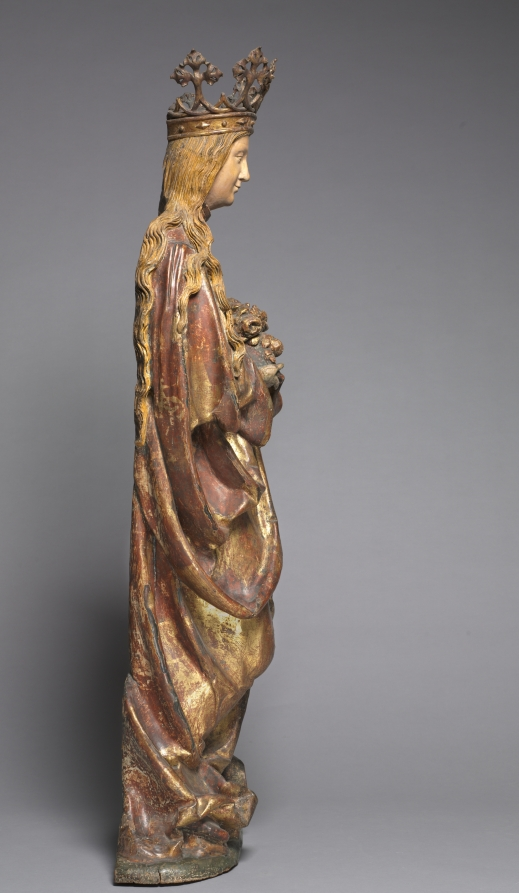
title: Saint Elizabeth of Hungary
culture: Germany, Bavaria, 16th century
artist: Mätthaus Kreniss (German)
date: c. 1515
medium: lindenwood with polychromy and gilding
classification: Sculpture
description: Saint Elizabeth was born in 1207, the daughter of Andreas II, King of Hungary; her crown alludes to her royal birth. Many legends about her generosity and work on behalf of the poor were circulated in the Middle Ages, among them the subject of this sculpture: food she was carrying to the poor was miraculously changed to roses to avoid discovery by her husband. Much of the original paint and gilding is preserved on this sculpture except the face, which had been stripped and repainted in heavy oils prior to its acquisition by the museum. This modern paint has been removed.